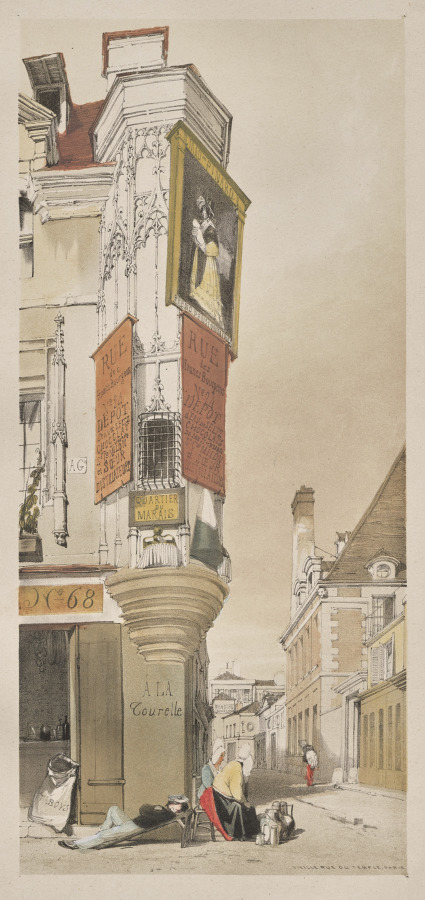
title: Picturesque Architecture in Paris, Ghent, Antwerp, Rouen: Vieille Rue du Temple, Paris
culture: England, 19th century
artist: Thomas Shotter Boys (British, 1803–1874)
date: 1839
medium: lithograph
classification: Portfolio